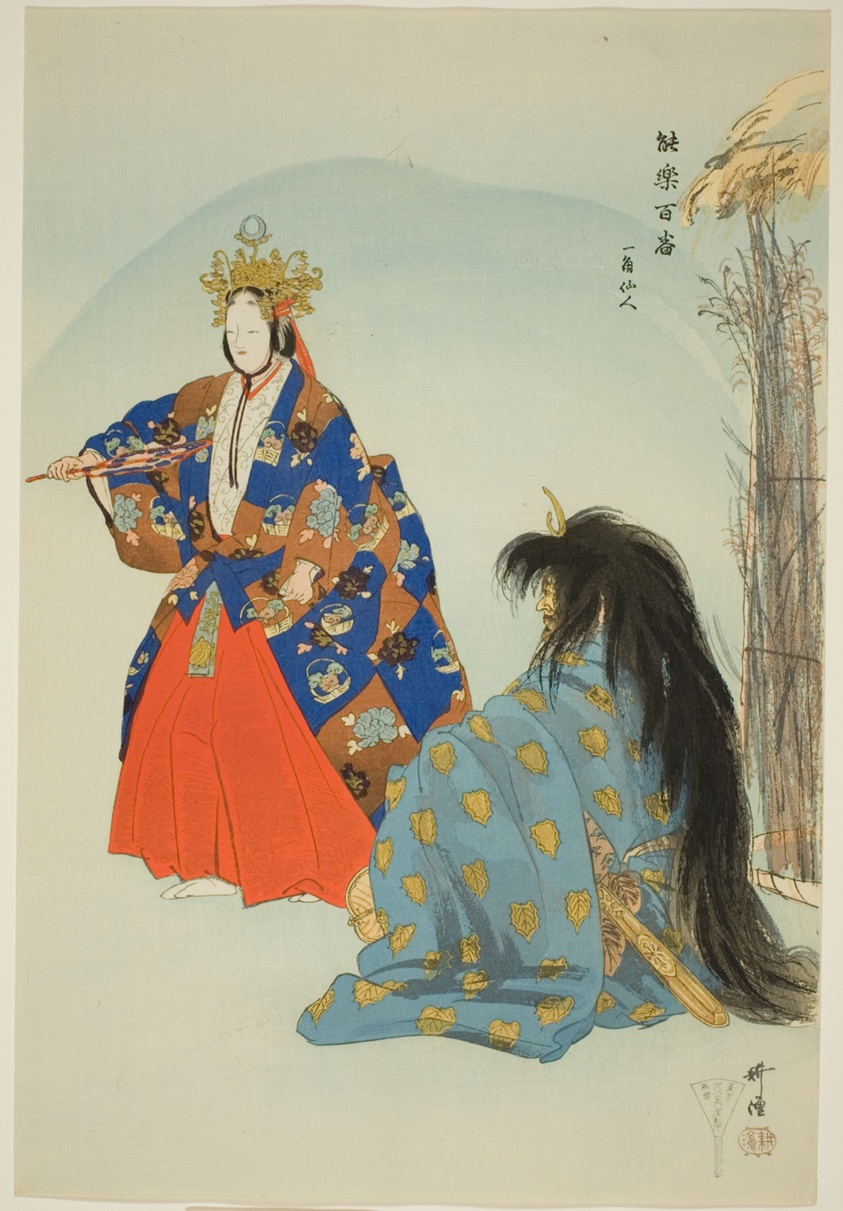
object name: Print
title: Ikkaku Sennin, from the series "One Hundred No Dramas (Nogaku hyakuban)"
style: Japanese (culture or style)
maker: Tsukioka Kogyo; Japanese, 1869-1927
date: 1898/1903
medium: Color woodblock print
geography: Japan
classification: woodblock print; print; asian art